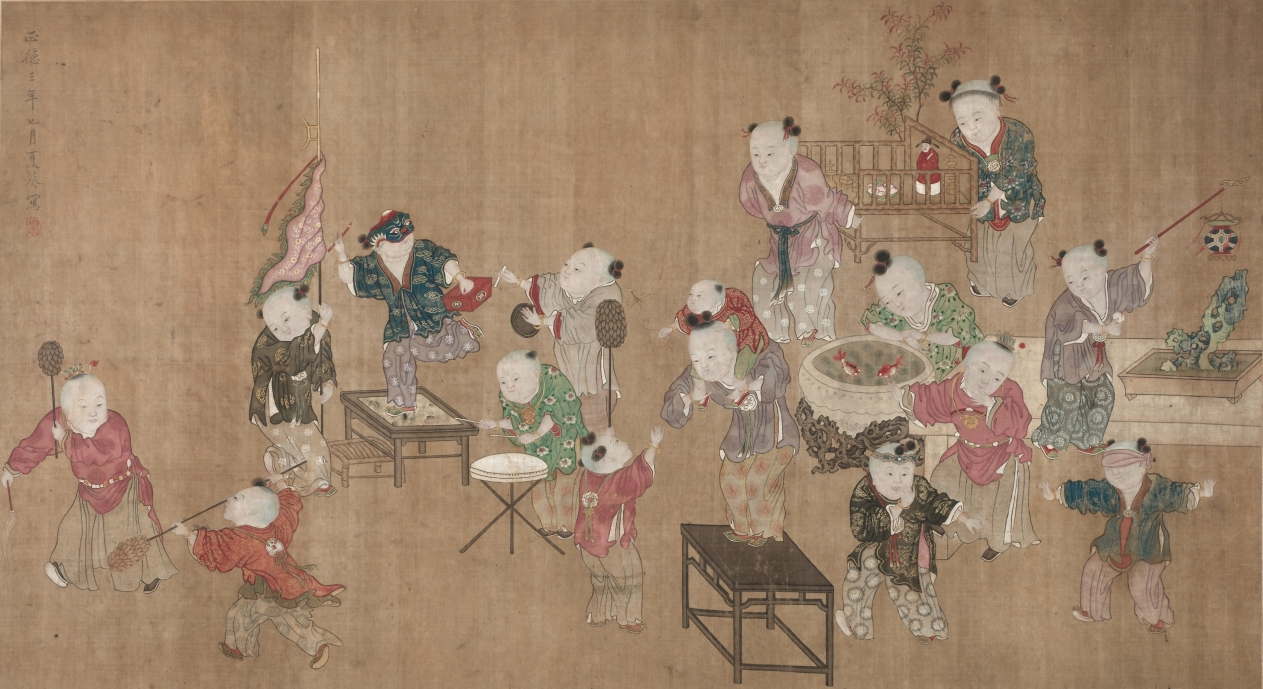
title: Children at Play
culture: China, Ming dynasty (1368–1644)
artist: Xia Kui (Chinese, active c. 1405–1445)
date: 1508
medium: hanging scroll; ink and color on silk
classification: Painting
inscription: 正德三年七月夏葵寫 [Zhengde san nian qi yue Xia Kui xie]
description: Sixteen children engage in scholarly, religious, and military activities, representing the popular “one hundred boys” theme expressing the wish for abundant, successful male offspring. Such paintings conveying auspicious wishes were often displayed during the New Year festival season. Two older boys wear small crowns with red tassels. Another child with a mask holds a brush in one hand, a rice measure in the other. He stands on a low table imitating Kuixing, the God of Examinations and servant to the God of Literature.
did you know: In the foreground on the right are three boys playing a kind of blind man’s bluff.